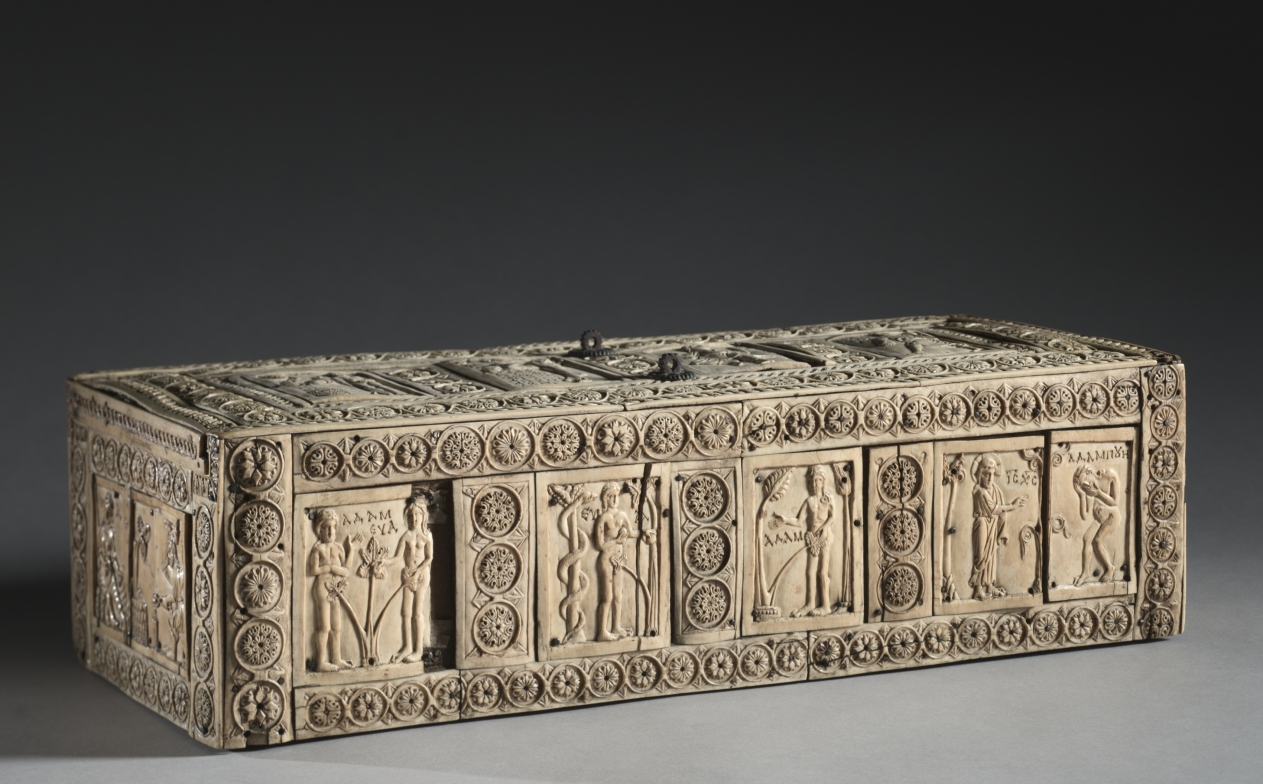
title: Ivory Box with Scenes of Adam and Eve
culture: Byzantium, Constantinople, Byzantine period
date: 1000–1100s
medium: ivory, wood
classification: Ivory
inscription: Greek inscriptions are included in each plaque.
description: Scenes from the Old Testament stories of Adam and Eve and their children, Cain and Abel, decorate this box, which may have been made to contain jewelry or small valuables. On its lid two plaques depict the creation of Adam and the creation of Eve from Adam’s rib. Two further plaques depict Cain slaying Abel: Cain throws a stone in the direction of Abel, who is hit by stones in the hip, chest, and head.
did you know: Carved out of imported ivory by skilled craftsmen, boxes such as these were used by Byzantine elites to store luxury goods such as jewelry.